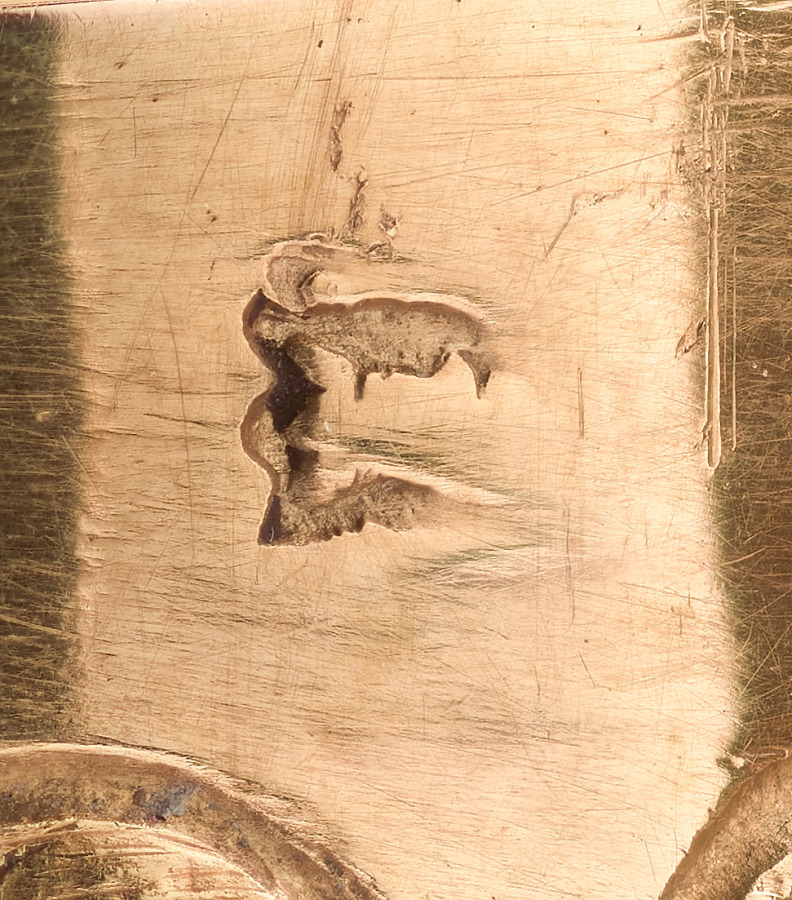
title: Gold Box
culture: France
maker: Juste-Aurèle Meissonnier (French, 1695–1750)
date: 1728–29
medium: gold and lapis lazuli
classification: Metalwork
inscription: IOM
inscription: a crowned M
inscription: a crowned dolphin's head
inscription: a crowned chancellor's mace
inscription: double frame eagle's head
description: With its central cartouche, heavy molding, and fluted sides, the design of this box attests to Juste-Aurèle Meissonnier’s interest in architecture. The box is further distinguished by a strong sense of movement, achieved through its dynamic contour, extraordinary level of detail, and the dramatic contrast between gold and lapis lazuli. Such small boxes, known as snuffboxes, were used to hold scented powdered tobacco that was inhaled through the nostrils. Made of precious materials and highly ornamented, they conveyed the owner’s wealth, fashion awareness, sophistication, and social standing. These personal, collectible items were often presented as luxurious gifts. This box was made for the dowager Queen of Spain, Maria Anna of Neuburg, whose coat of arms – along with that of her late husband, Charles II – features on the cover.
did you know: This is one of the two known objects that bear the maker's mark of Meissonnier.